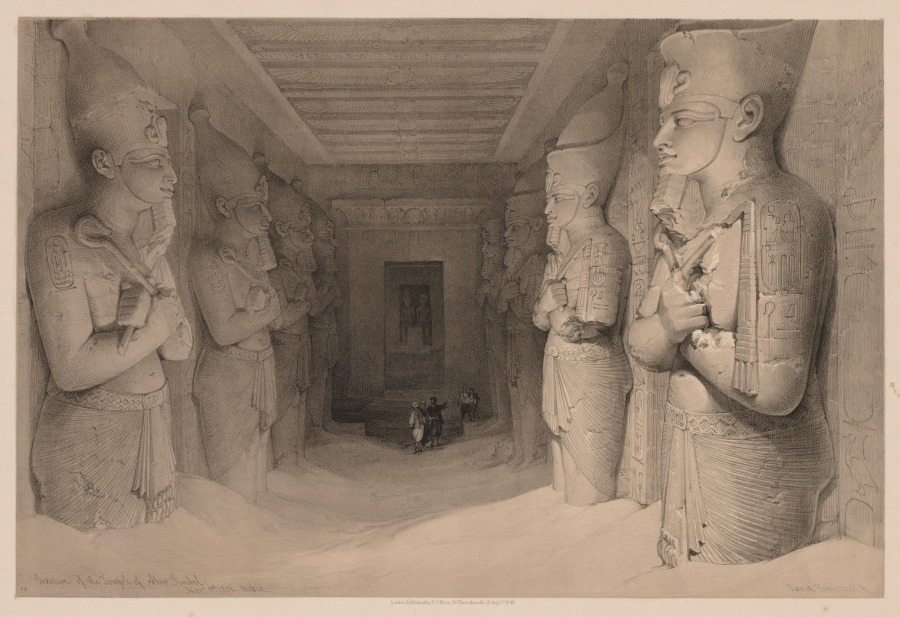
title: Egypt and Nubia: Volume I - No. 14, Interior of the Temple Aboo Simbel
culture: England, 19th century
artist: Louis Haghe (British, 1806–1885)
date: 1836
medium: color lithograph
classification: Print